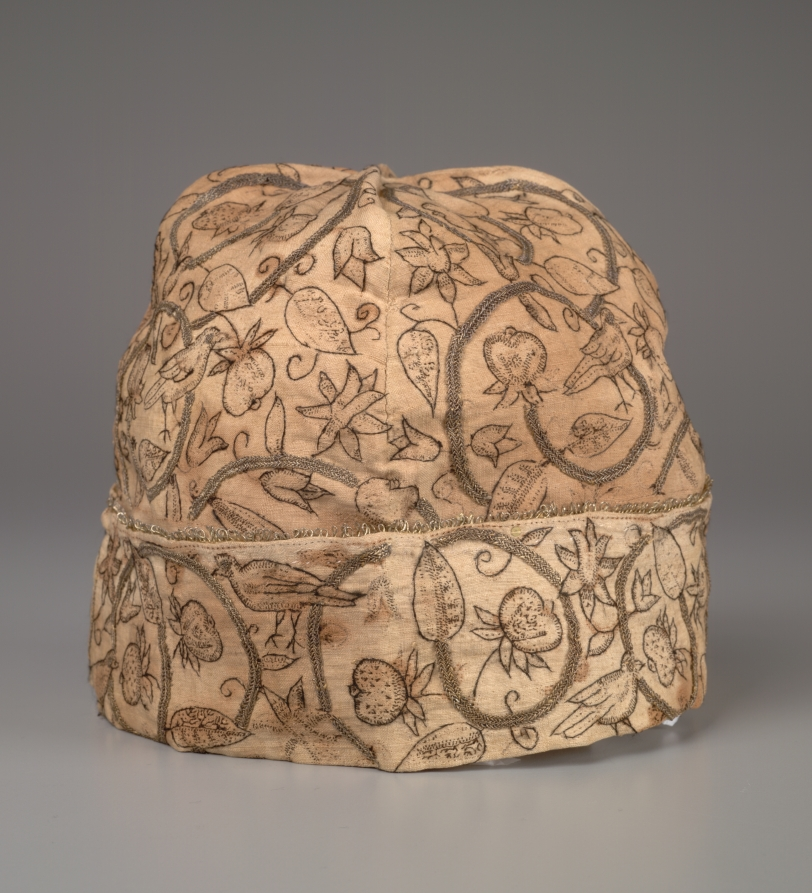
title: Man's Cap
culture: England, Elizabethan Period, late 16th century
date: late 1500s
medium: embroidery; silk and silver gilt thread on linen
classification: Embroidery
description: According to Elizabethan embroidery scholar Jacqui Carey, the construction and design of this man’s nightcap is typical of the period. The embroidery on this nightcap—worked with both black silk thread and silver metal thread (metal strips wrapped around a white silk core) onto a plain weave linen fabric—features daffodils, birds, and fruit set within coiling stems and foliage. Five different stitches are used, including Elizabethan plaited braid stitch, chain stitch, stem stitch, straight stitch, and Elizabethan spider’s web stitch. The arrangement of the motifs is the same in each quadrant, and similar motifs are repeated around the brim. In places, the ink lines of the design are visible on the fabric, though most are covered with the embroidery.